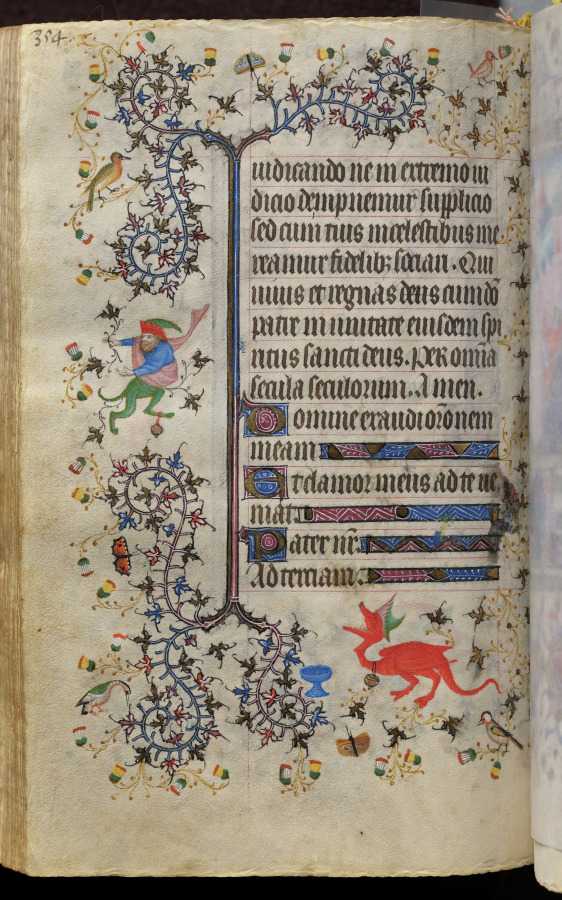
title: Hours of Charles the Noble, King of Navarre (1361-1425): fol. 172v, Text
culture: France, Paris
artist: Master of the Brussels Initials and Associates (French)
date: c. 1405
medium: ink, tempera, and gold on vellum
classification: Bound Volume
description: This precious volume was obviously highly prized by its owner, the French-born King of Navarre, who had his coat of arms painted on no less than twenty folios. Rather than directly commissioning this manuscript from a specific workshop, it seems that Charles the Noble acquired his book of hours -- perhaps ready-made for the luxury market -- while on a trip to Paris in 1404-05. A collaborative effort, six painting styles are evidenced within the pages of this codex, those of two Italians, two Frenchmen, and two Netherlanders. The painter who was responsible for the planning and decoration of the book, and who produced seventeen of the large miniatures, was a Bolognese artist known as the Master of the Brussels Initials. His principal assistant, responsible for most of the borders, was a Florentine who signed his name "Zecho" da Firenze on folio 208 verso.